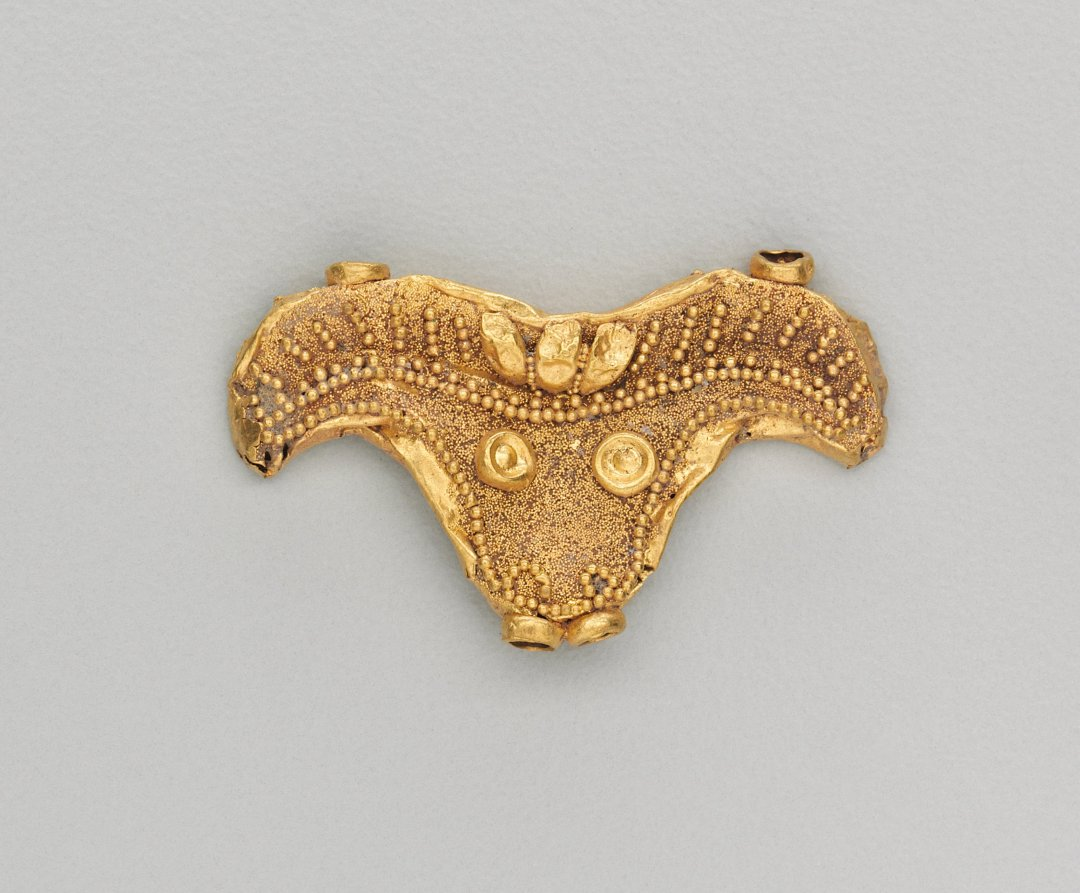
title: Set of Pendants Ending in a Bull's Head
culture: India, Shunga period (185–78 BCE)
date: 185–72 BCE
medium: gold repoussé with granulation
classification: Jewelry